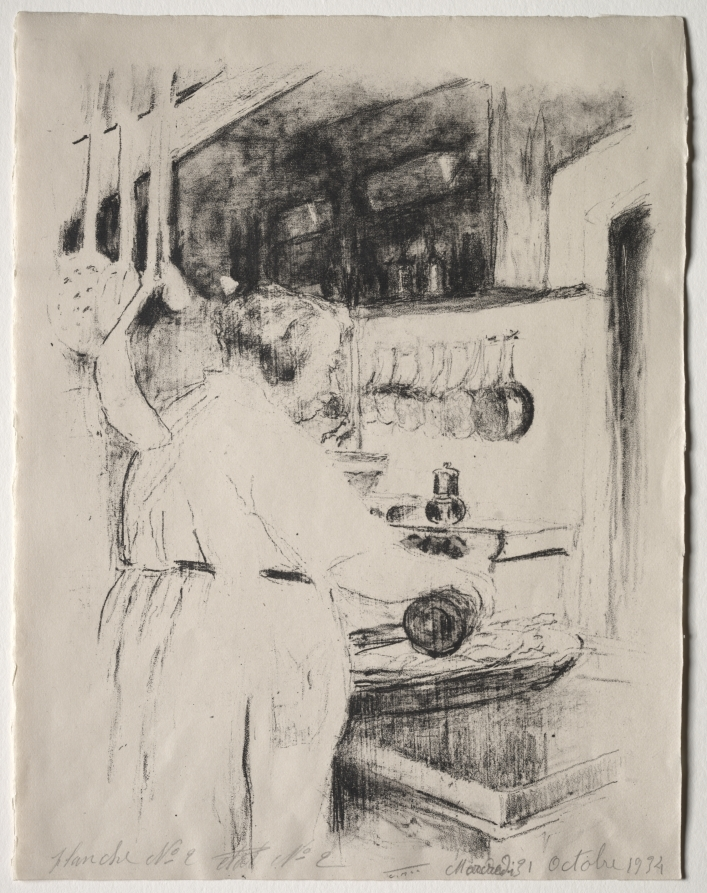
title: Cooking: The Cook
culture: France, 19-20th Century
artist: Édouard Vuillard (French, 1868–1940)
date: 1934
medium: lithograph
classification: Print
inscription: Lower margin, in graphite: planche No 2 etat No 2 Mercredi 31 Octobre 1934